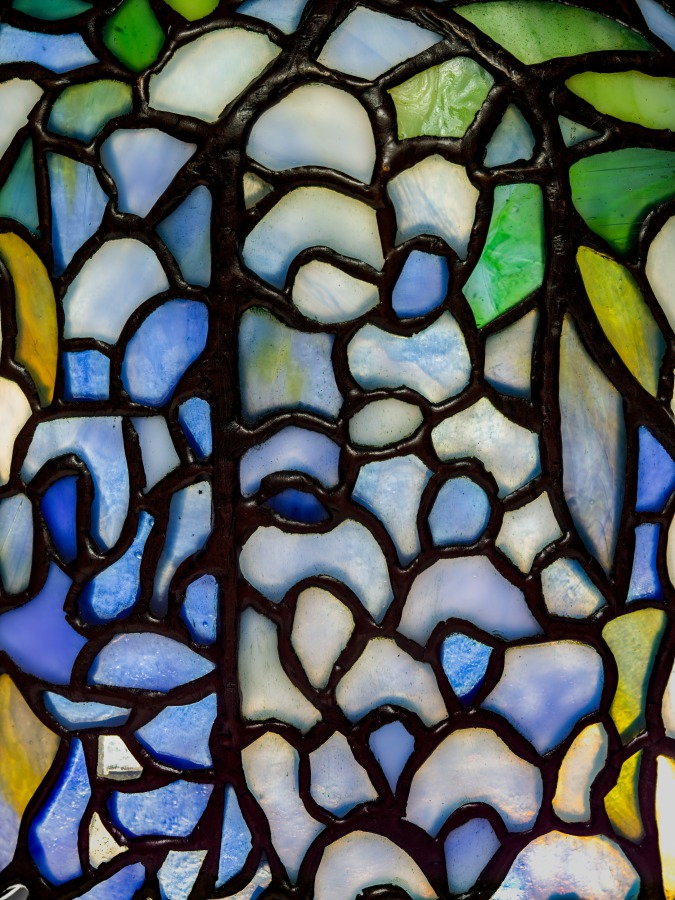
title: "Pony" Wisteria Lamp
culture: America, New York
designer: Clara Wolcott Driscoll (American, 1861–1944)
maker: Tiffany Studios (United States, New York, 1902–32)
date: c. 1902–10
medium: leaded glass, bronze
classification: Lamp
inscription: Base impressed: TIFFANY STUDIOS/NEW YORK/7002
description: The dawn of the 20th century spurred fresh approaches to design. Louis Comfort Tiffany’s great contribution to this new art movement, termed the Art Nouveau, was not only the shimmering iridescence of his Favrile glass but also the naturalistic compositions of his lamps and windows, which brought him commercial and critical success in both Europe and America. The artistic blend of sculpture and function in the Wisteria lamp, in which the base rises up to form the branches of the vine, became a hallmark of Tiffany's Art Nouveau production. This lamp, designed by Clara Wolcott Driscoll, Tiffany's chief lamp designer, won a grand prize for Tiffany Studios at the 1902 international exposition in Turin, Italy.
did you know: This small version of the Wisteria Lamp was called a "pony" by Tiffany and his artisans.